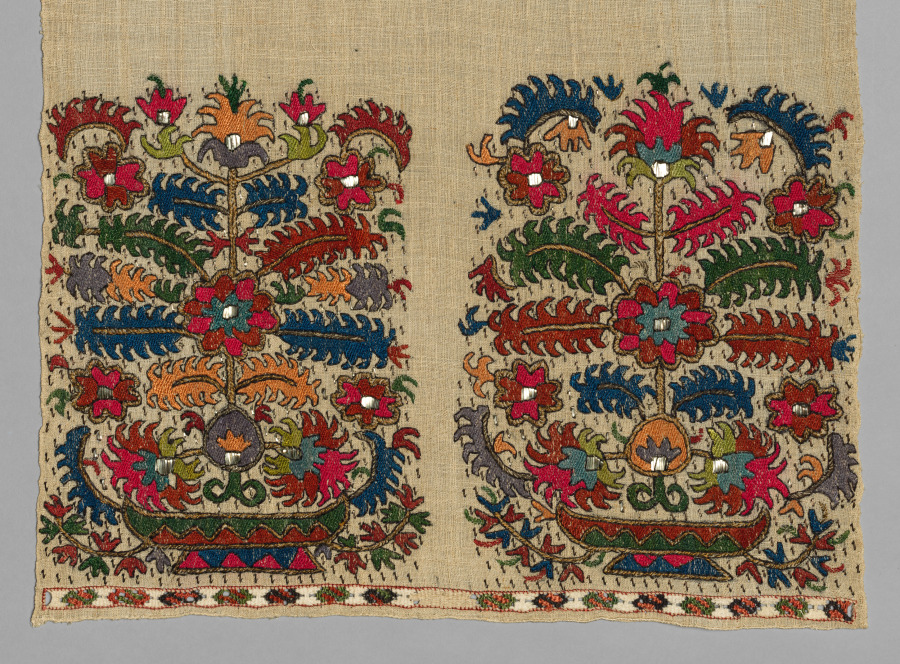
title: Towel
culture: Greece, Sporades Islands, Skyros, 18th century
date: 1700s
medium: embroidery in silk, gold and silver threads on natural linen ground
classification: Embroidery